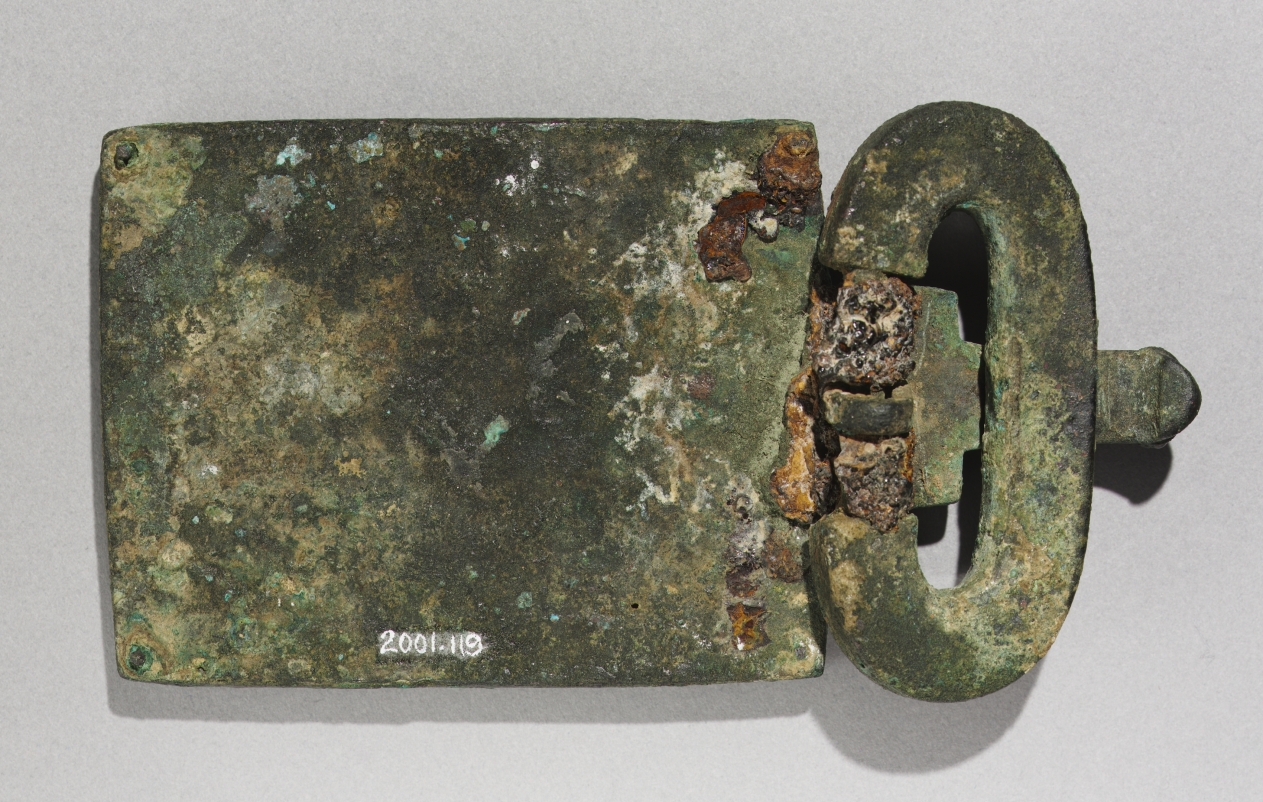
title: Belt Buckle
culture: Visigothic, Spain, Migration Period, 6th century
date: c. 525–560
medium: bronze with garnets, glass, mother of pearl, gold foil, traces of gilding; bronze and glass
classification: Jewelry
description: The art of the European Migration Period (3rd-7th centuries AD) is almost exclusively one of personal adornment-a portable art that followed men and women to their graves. Belt buckles with large rectangular attachment plates have been discovered in cemeteries across the Iberian Peninsula-now occupied by Spain and Portugal-from the period of Visigothic occupation (about AD 412-711). Their decoration varies. Finer examples, like this one, are distinguished by brilliantly inlaid semi-precious stones and colored glass. Garnets were especially prized in Visigothic society for use in cloisonné jewelry. The technique involved the fitting of carefully cut pieces of polished garnet into an intricate grid of compartments, or cloisons. This buckle is so densely inlaid with garnets that it presents a virtual "carpet" of red to the eye. These large Visigothic buckles are strikingly uniform in shape yet endlessly varied in surface design, perhaps a sign that they expressed the personal identities of their original owners. Grave excavations have shown that belt buckles of this type were made for women.